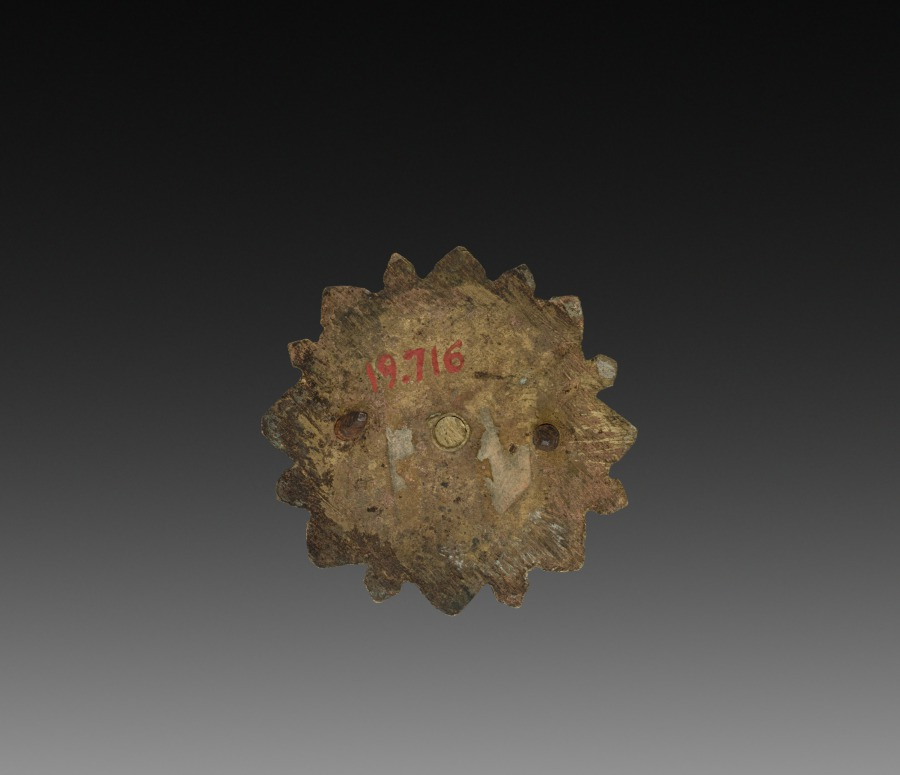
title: Ornamental Hook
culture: France, 18th century, Period of Louis XVI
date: 1775–1799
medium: gilt bronze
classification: Metalwork